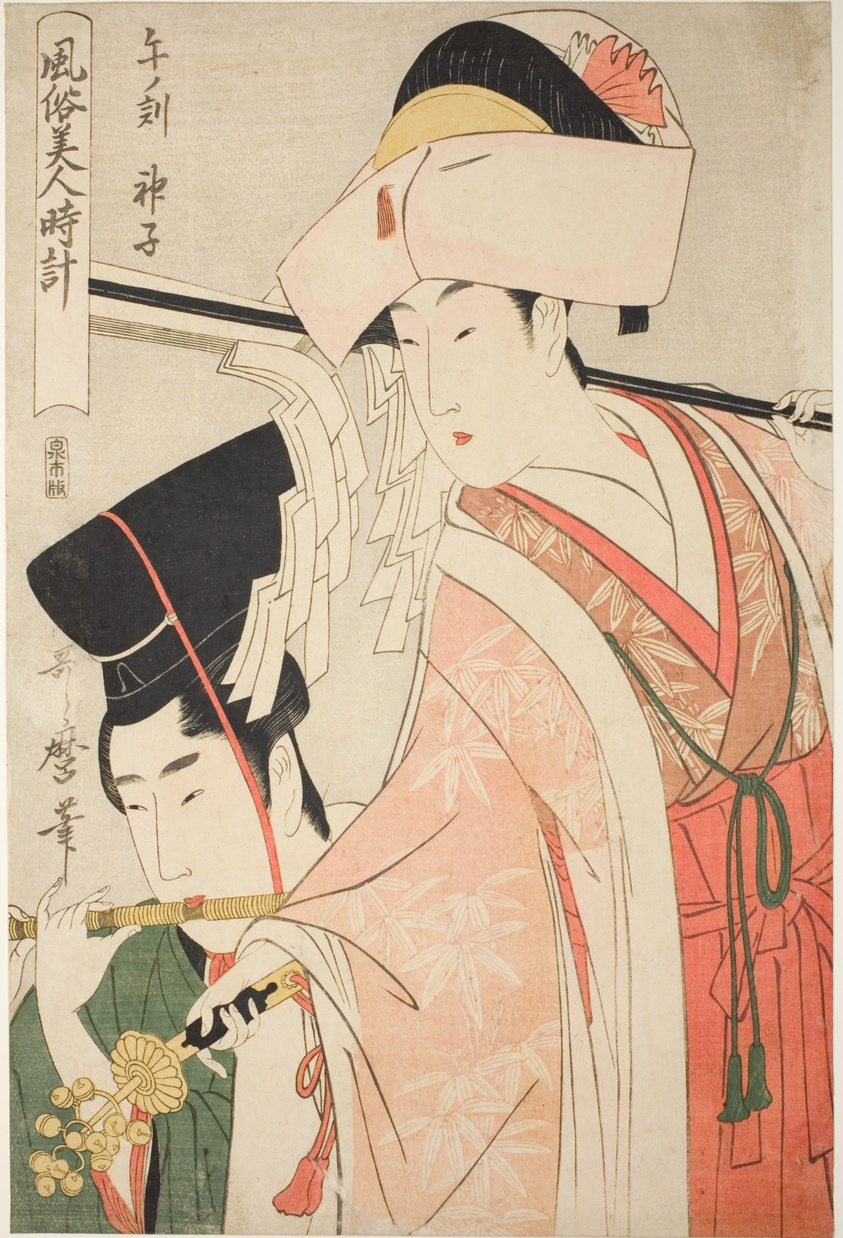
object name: Print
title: Hour of the Horse [12 am], Shrine Maiden (Uma no koku, miko), from the series “Customs of Beauties Around the Clock” ("Fuzoku bijin tokei")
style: Japanese (culture or style)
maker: Kitagawa Utamaro 喜多川 歌麿; Japanese, 1753 (?)-1806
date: c. 1798/99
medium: Color woodblock print; oban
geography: Japan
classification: woodblock print; print; asian art